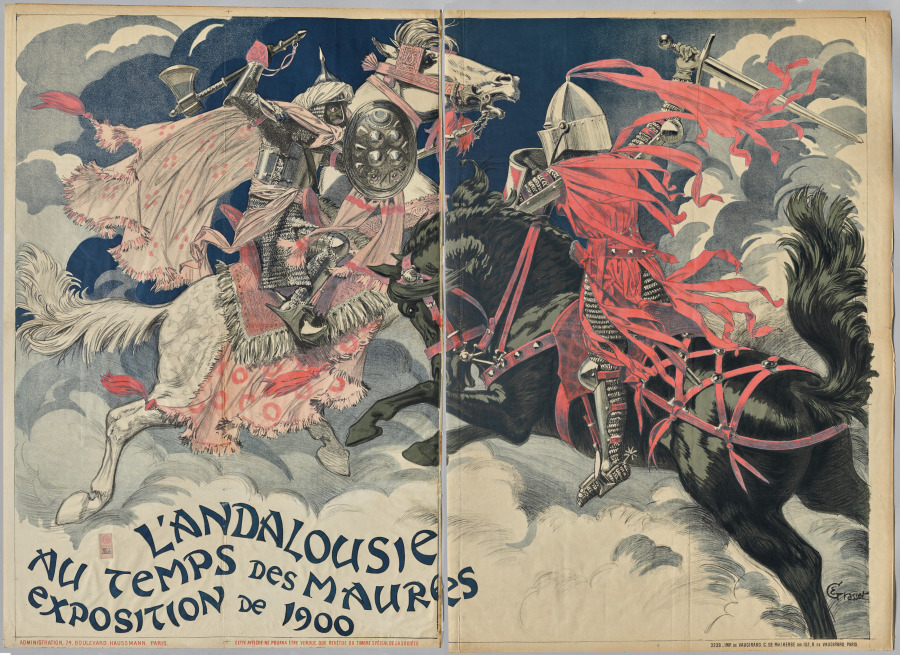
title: Andalusia at the Time of the Moors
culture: France, Paris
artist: Eugène Grasset (French, 1841–1917)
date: c. 1900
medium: color lithograph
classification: Print